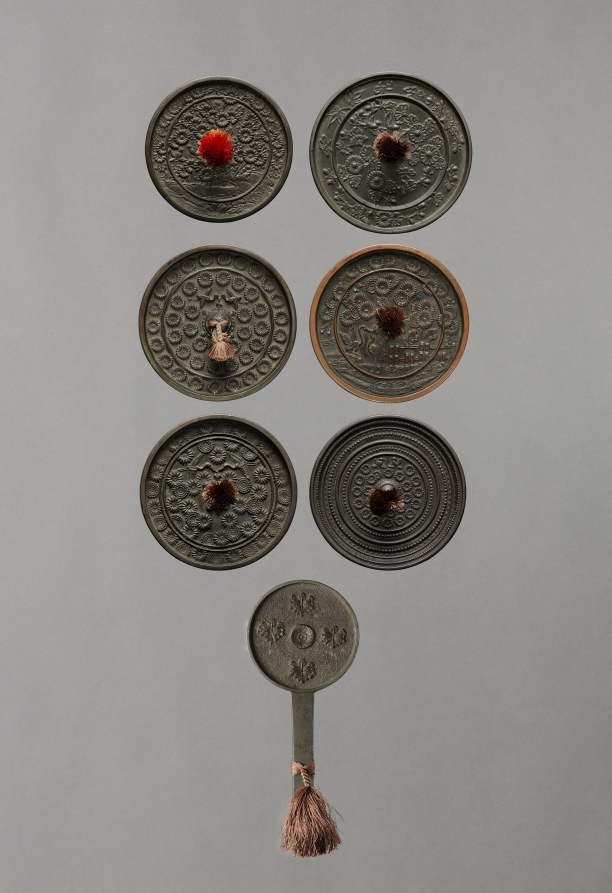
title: Mirror with Pair of Birds in Chrysanthemum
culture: Japan, Muromachi period (1392–1573)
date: 1392–1573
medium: bronze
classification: Metalwork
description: The Japanese used chrysanthemums as decorative elements on mirrors. In the Heian period, a chrysanthemum with cranes or long-tailed birds was a common motif. Later, in the Kamakura and Muromachi periods, chrysanthemum designs were divided into three patterns with different symbolic associations: Chrysanthemum with Cranes represented longevity; Water Flowing suggested longevity as well as the Noh drama Kikujido, or Chrysanthemum Boy; and East Fence alluded to the poem "Drinking Wine" by Tao Yuanming (AD 365–427). Here, the mirror featuring Buddhist iconography (kyojo) and a chrysanthemum design on the back shows that the flower was also appreciated in the context of Buddhism in the Kamakura period.